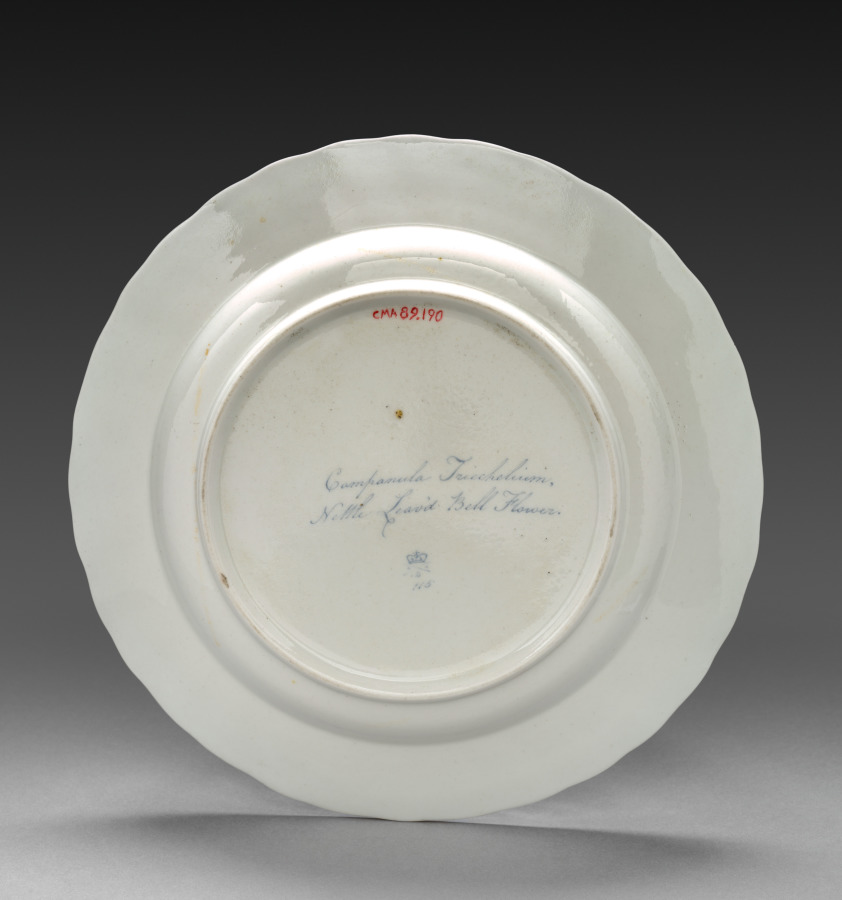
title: Plate from Dessert Service: Nettle Leaved Bell Flower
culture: England, Derby, 18th century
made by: Derby (Crown Derby Period) (British)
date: c. 1800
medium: porcelain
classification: Ceramic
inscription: inscribed in blue on back: Campanula Triechelium./Nettle Leaved Bell Flower./crown/crossed batons and dots/D/115.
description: Each dish is decorated with recognizable plants, the names of which are inscribed on the base in both Latin and English. Identifying the blossoms only became customary in the late 18th century when a single piece of porcelain was decorated with one species, and flowers were represented along with leaves, stems, seed pods, and roots. All of this reflects Carolus Linnaeus’s recent invention of a scientific method to categorize all known flora. The decorations on the Derby factory’s products derive from contemporary English botanical publications. For instance, illustrations in William Curtis’s The Botanical Magazine served as models for the French marigold and nettle-leaved bell flower on the dessert service.